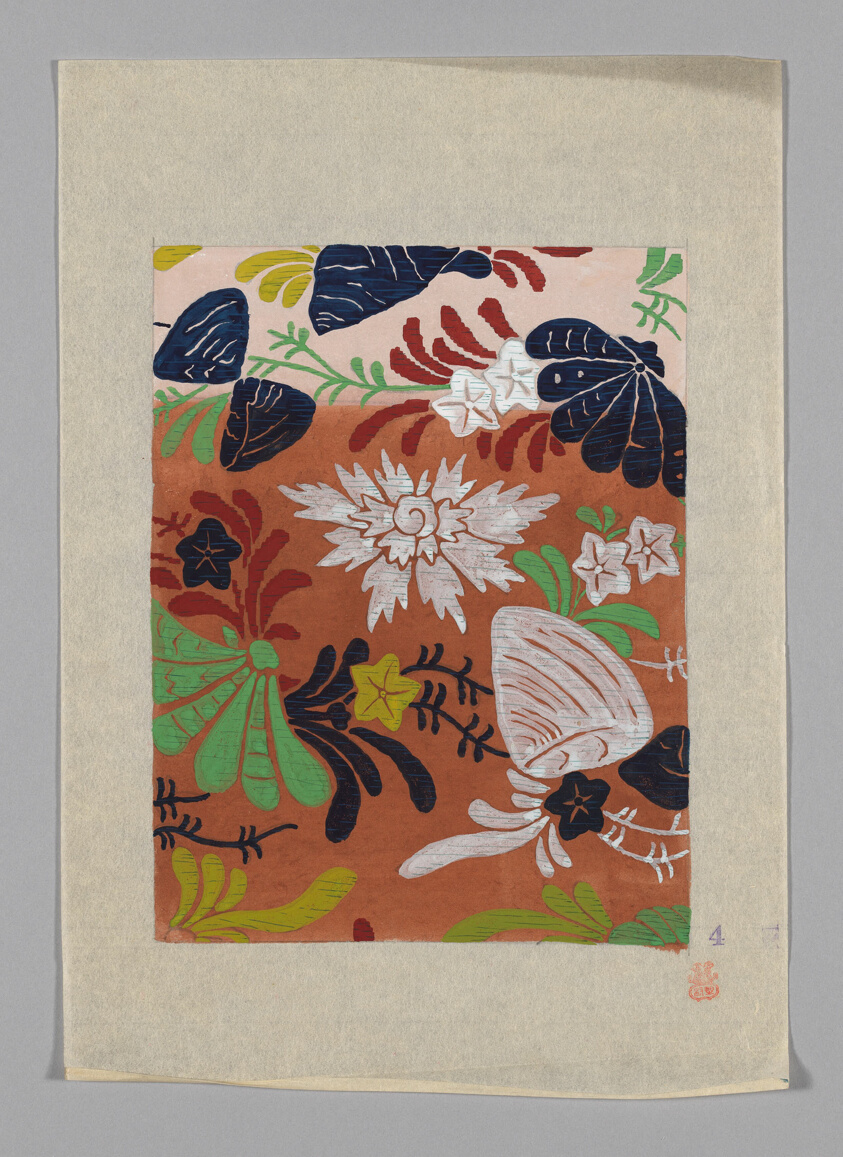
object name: Drawing and Watercolor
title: Design on Paper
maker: Japan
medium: Paper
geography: Japan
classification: textile; accessory - paper design; watercolor; paper